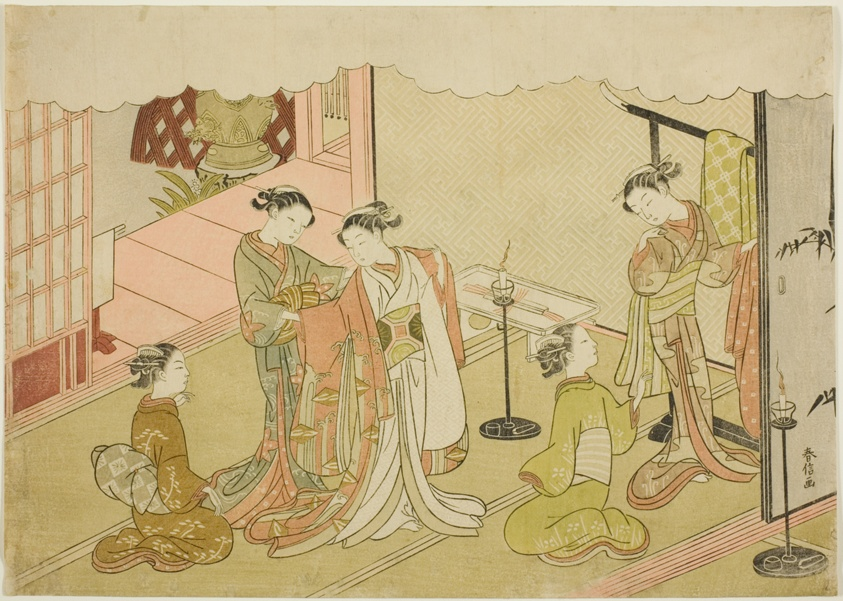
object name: Print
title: The Bride Changing Clothes (Iro-naoshi), the fifth sheet of the series "Marriage in Brocade Prints, the Carriage of the Virtuous Woman (Konrei nishiki misao-guruma)"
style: Japanese (culture or style)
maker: Suzuki Harunobu 鈴木 春信; Japanese, 1725 (?)-1770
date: c. 1769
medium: Color woodblock print; chuban yoko-e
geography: Japan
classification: woodblock print; print; asian art